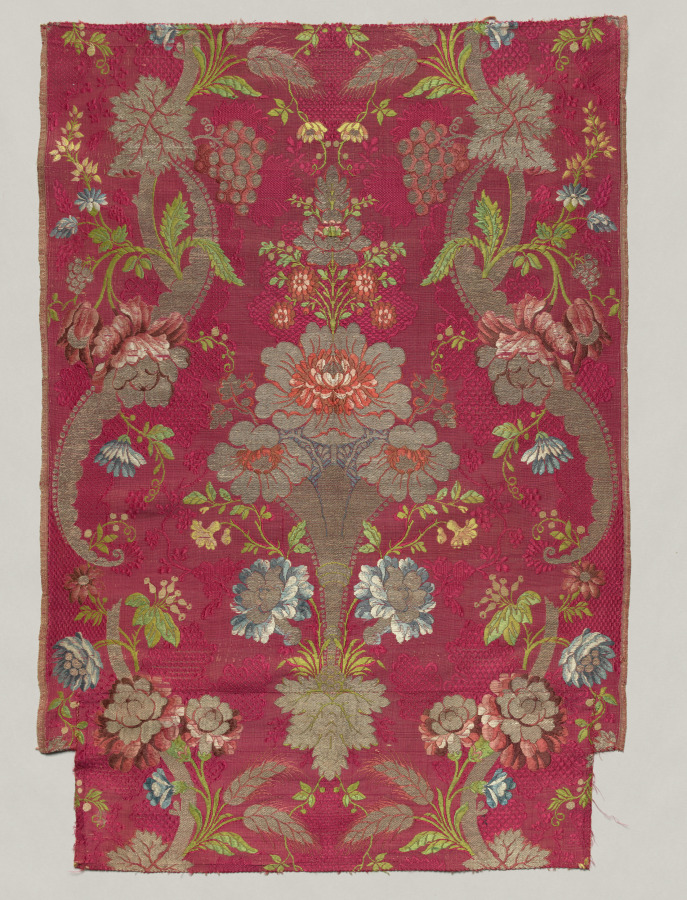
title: Silk Fragment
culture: Spain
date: 1700s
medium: plain compound cloth, brocaded; silk and metal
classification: Textile